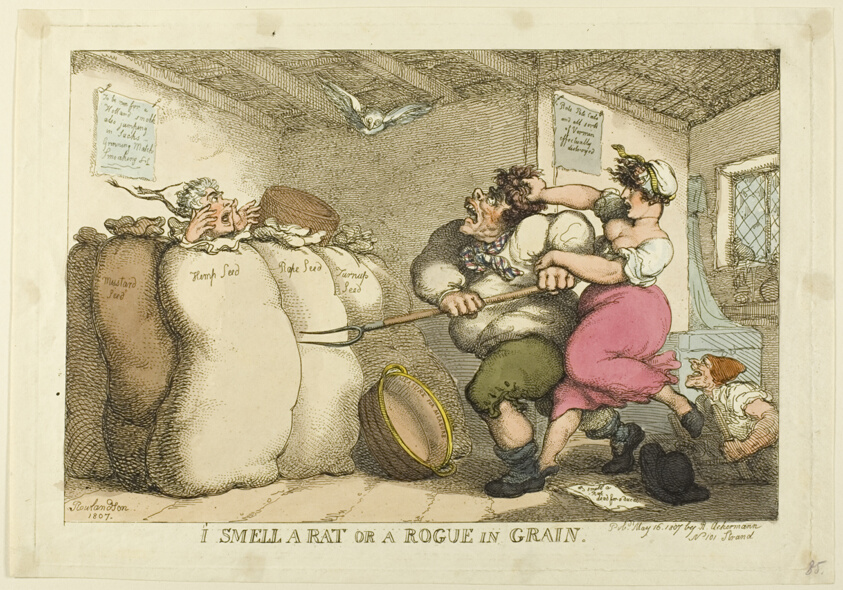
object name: Print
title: I Smell a Rat or a Rogue in Grain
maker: Thomas Rowlandson (English, 1756-1827); published by Rudolph Ackermann (English, 1764-1834)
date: published May 16, 1807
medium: Hand-colored etching on ivory wove paper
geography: England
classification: etching; print; prints and drawing